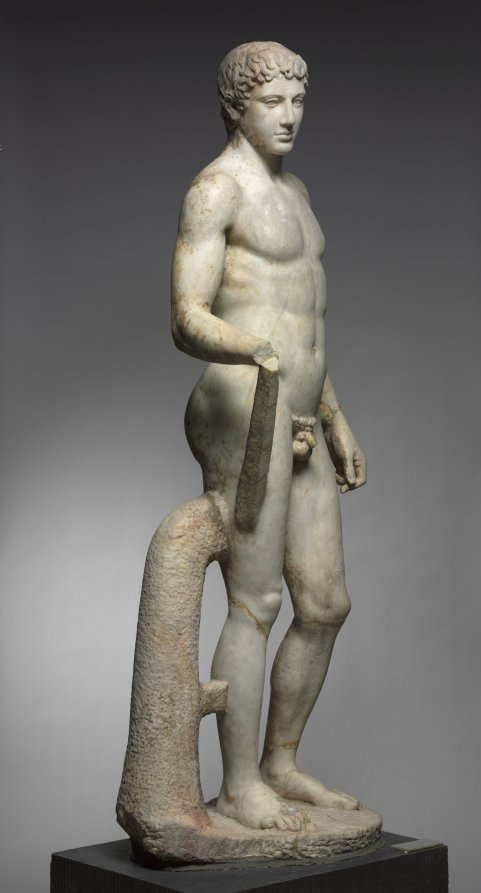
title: Statue of an Athlete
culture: Italy, Roman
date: 1–100 CE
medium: marble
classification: Sculpture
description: This idealized athlete recalls Greek sculptural types invented and popularized during the 400s BC. Large-scale athletes and other sculptures like this were originally created by famous artists as sanctuary dedications. Centuries later, they were widely copied and adapted by Roman sculptors, whose clients sought their own versions of earlier masterpieces. Working in marble rather than bronze, these sculptors added certain elements for stability, such as the struts and the large tree trunk beside the right leg here. Sculptures like this one are profoundly complex, made by and for Romans but descended from Greek ancestors.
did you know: For many years, this sculpture stood in the rotunda of the Cleveland Museum of Art.